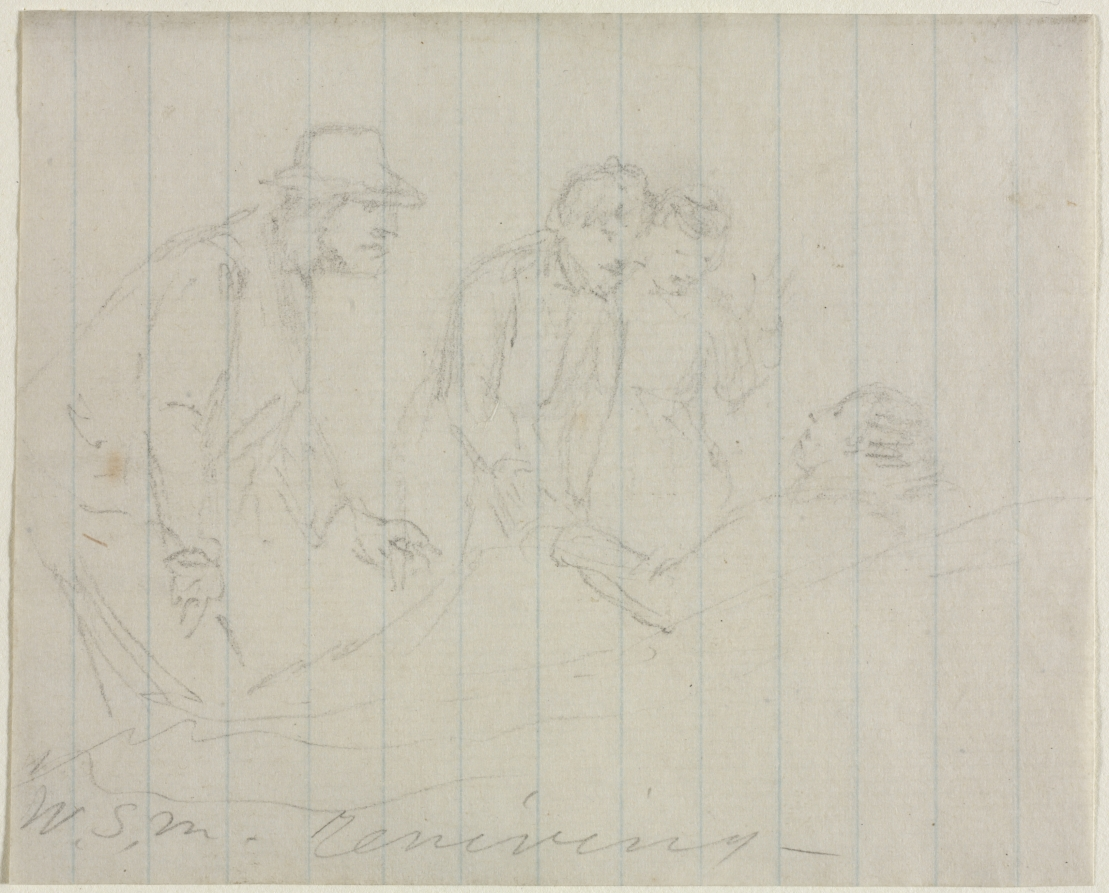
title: Reviving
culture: America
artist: William Sidney Mount (American, 1807–1868)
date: c. 1827–68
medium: graphite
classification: Drawing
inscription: Signed with initials in pencil